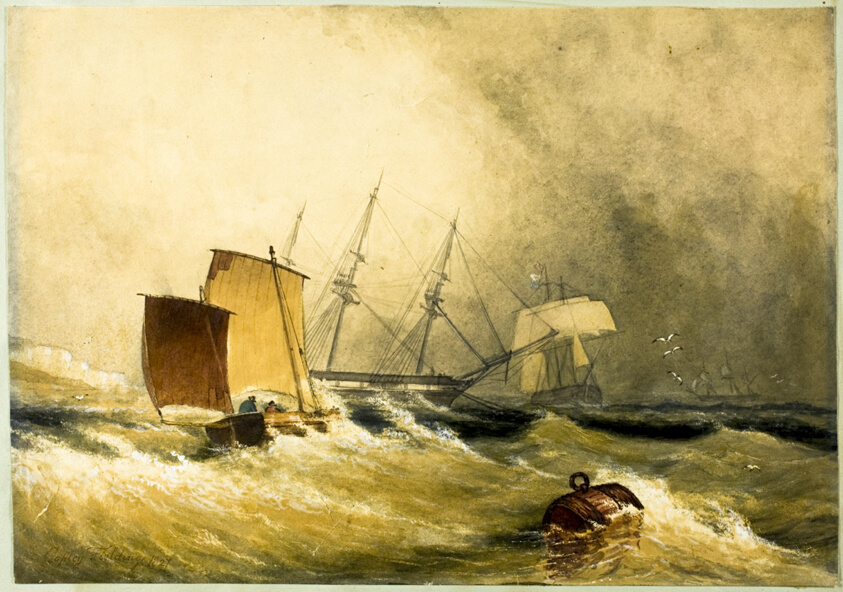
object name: Drawing and Watercolor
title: Marine Scene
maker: possibly or an imitator of Anthony Vandyke Copley Fielding; English, 1787-1855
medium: Watercolor and gouache, with scraping, heightened with varnish, over traces of graphite, on cream wove paper, laid down on green wove paper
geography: England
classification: watercolor; drawings (visual works); prints and drawing